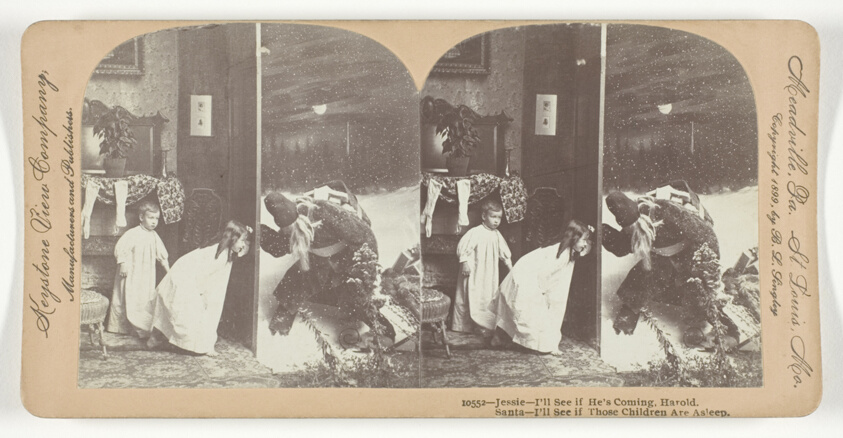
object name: Photograph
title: Jessie - I'll See if He's Coming, Harold. Santa - I'll See if Those Children Are Asleep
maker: Keystone View Company; American, 1892-1963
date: 1899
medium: Albumen print, stereo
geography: Saint Louis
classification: photography; photograph; albumen silver print; stereograph (albumen)